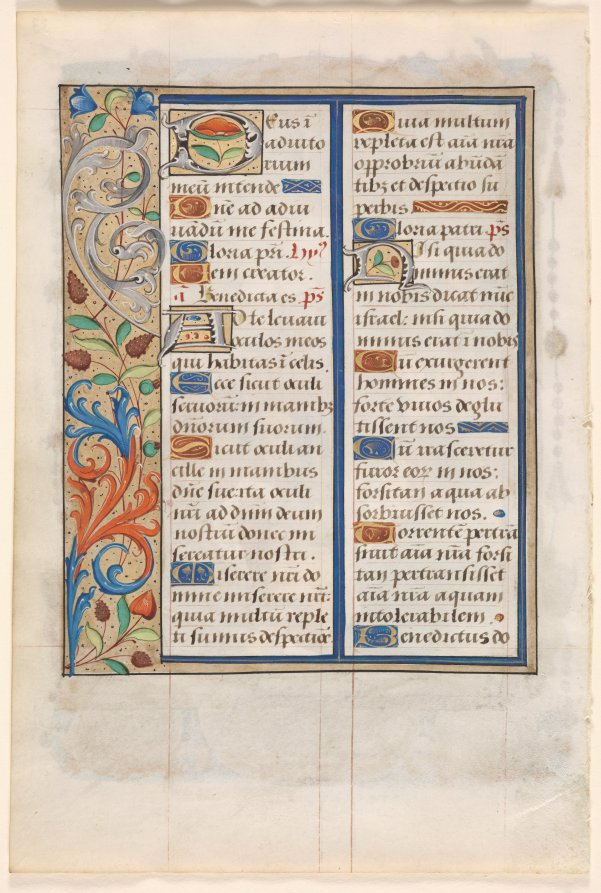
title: Leaf from a Book of Hours: Text with Illustrated Border (verso)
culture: France, Rouen, 16th century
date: c. 1510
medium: ink, tempera and liquid gold on vellum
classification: Manuscript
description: Characteristic of the artist's hand, the bright orange-reds combine with deep blues, greens, and an abundance of gold wash in this leaf. He used fine parallel lines or crosshatching in gold to indicate the shading, highlights, and texture of draperies, suggesting some knowledge of printmaking, an art for which Rouen was also an important center. His figures have large, thickly outlined oval faces. This miniature also demonstrates the emerging fashion in both Rouen and Paris for highly involved, Italianate architectural frames: winged putti, swags, urns, garlands, scallop shells, pillasters, and masks. These elements could be assembled in different ways so that no two frames were identical. Rouen in the late 1400s and early 1500s was an established and important center for book production. Richly decorated library texts and books of hours, such as the present leaves, were made in Rouen for sale in the cours des libraires, next to the cathedral.